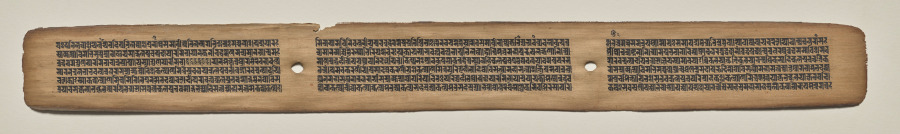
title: Text, folio 174 (recto), from a Manuscript of the Perfection of Wisdom in Eight Thousand Lines (Ashtasahasrika Prajnaparamita-sutra)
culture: Eastern India, Bihar, Vikramashila Monastery. Painting: Nepal, Kathmandu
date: Sunday, September 14, 1119 (year 239 of the Newar Samvat in the month of Ashvina)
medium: gum tempera and ink on palm leaves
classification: Painting